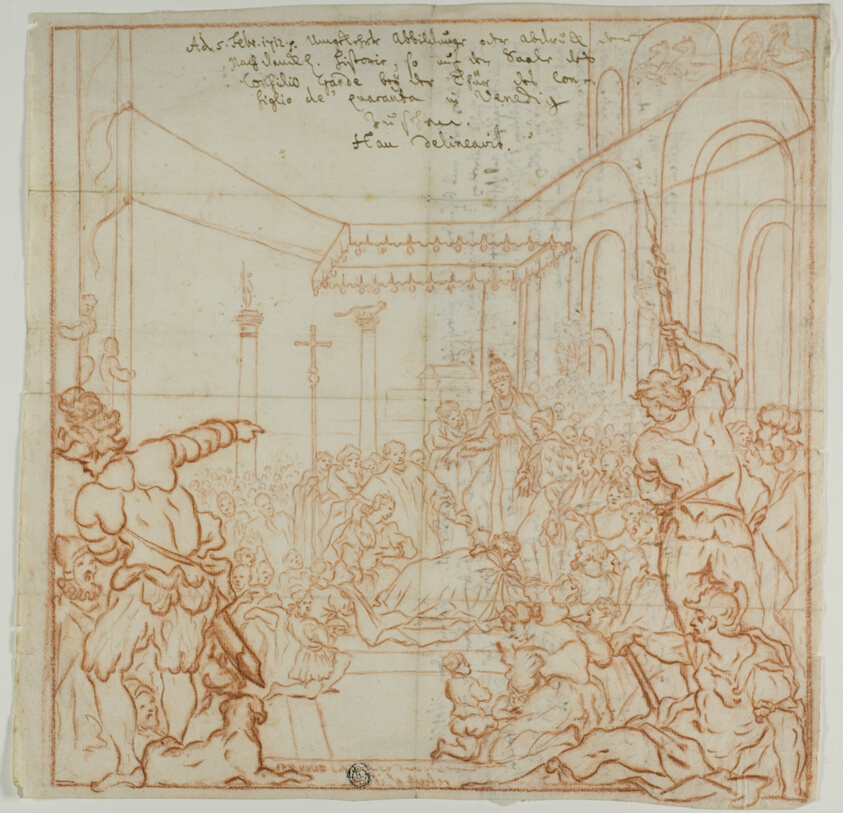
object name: Drawing and Watercolor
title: Submission of the Emperor Frederick Barbarossa to Pope Alexander III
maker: Hieronymus Hau (German, born 1679); after Federico Zuccaro (Italian, 1540/41-1609)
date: 1712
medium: Red chalk on ivory laid paper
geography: Italy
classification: chalk; drawings (visual works); prints and drawing